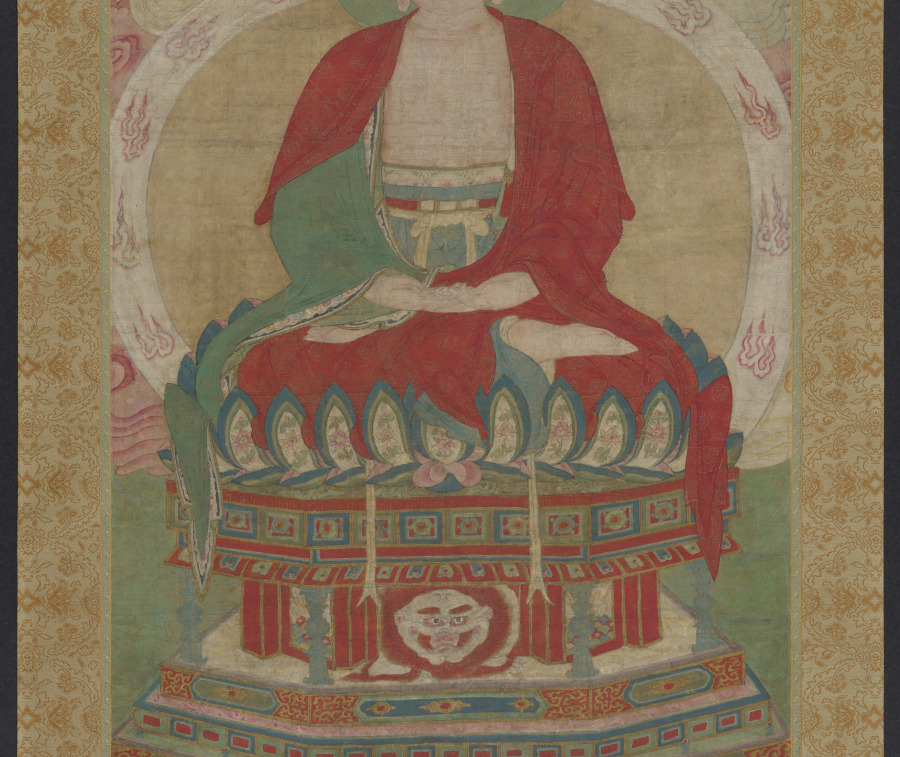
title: Seated Amitābha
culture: Chinese, Ming dynasty (1368-1644)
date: late 1500s–early 1600s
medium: hanging scroll; ink and color on silk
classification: Painting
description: This magnificent Buddha, called Amitābha (literally, “infinite light”) is seated on a lotus pedestal with both palms facing up over crossed legs, suggesting that it is in deep meditation. In contrast to the richly ornamented throne on which the Buddha is seated, the figure itself is devoid of any jewelry or decorative attributes, emphasizing its enlightened status and detachment from worldly affairs. The lion head in the center of the pedestal is a motif from Central Asia, which can also be seen in the halo or nimbus of Chinese Buddhist stone steles.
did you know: Originally, this scroll was acquired by the museum as a Korean work, but has now been tentatively reattributed as Ming period Chinese.